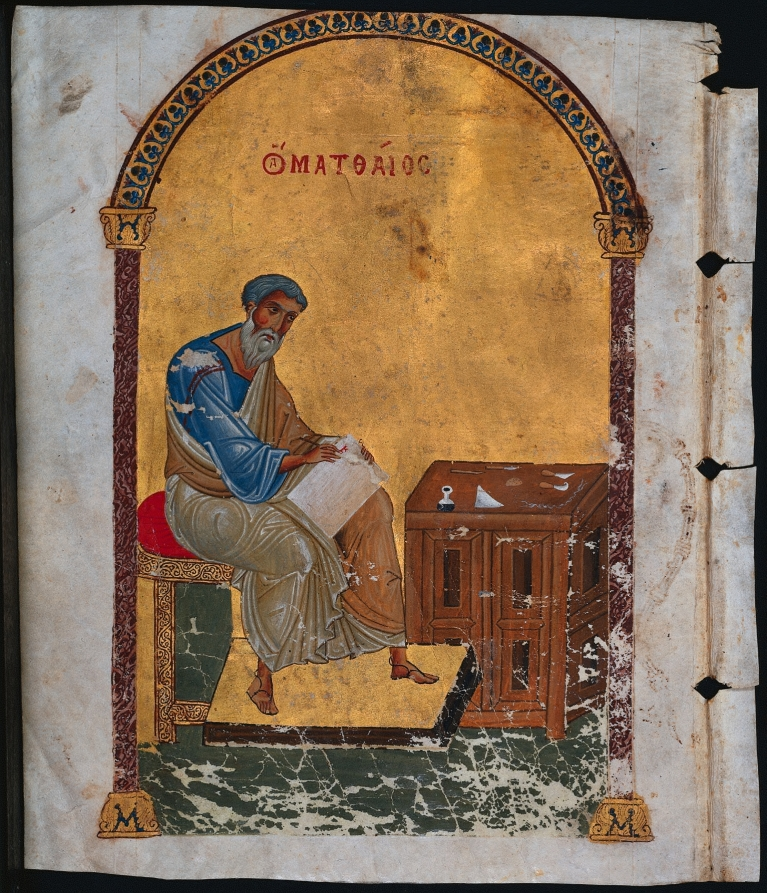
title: Leaf from a Lectionary with St. Matthew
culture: Byzantium, Constantinople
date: 1057–1063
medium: tempera and gold on vellum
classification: Manuscript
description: This leaf is from a lectionary (a book of gospel readings used in church services) that was presented to the Holy Trinity Monastery at Chalke in Constantinople by the Empress Katherine Komnene in 1063. The tools of the scribe's trade are laid out before the evangelists: a stylus (a pointed tool for writing, drawing, and engraving), a pair of dividers (a device resembling a compass, used for dividing lines and transferring measurements), pens, a knife, a burnisher (polishing tool), and inkpots. Portraits of the authors of the Gospels—Matthew, Mark, Luke, and John—appear frequently in gospel books throughout the Christian world. Understood to be eyewitnesses to the texts they wrote, their presence in these books served to "authenticate" the gospels.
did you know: Early Gospel lectionaries often had very costly treasure bindings in metalwork, sometimes with jewels and ivories.